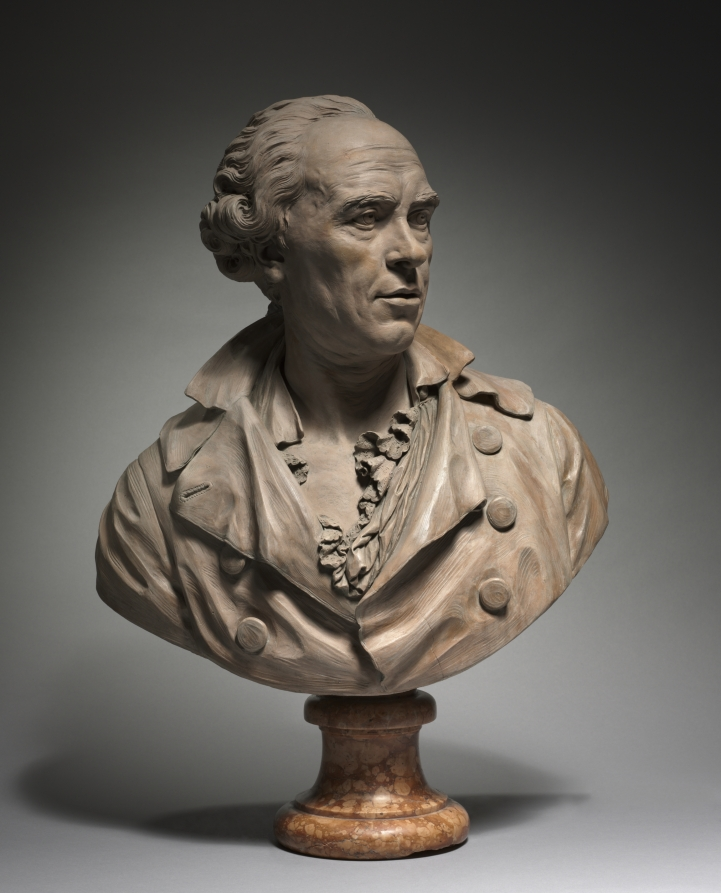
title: Portrait of Hubert Robert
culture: France, early 20th century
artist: copy after Augustin Pajou (French, 1730–1809)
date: early 1900s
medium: terracotta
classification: Sculpture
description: James David Draper published this work in 1997 as a 19th-century copy after Pajou, one of a number of copies after the primary version in Valence, partly owing to the slightly stiffer carving of the Cleveland bust and the lack of psychological depth compared to the autograph version. A thermoluminescence test, which determines the age of fired ceramics through small samples of the clay, proved that the work could not be dated before the late 19th century, and could easily date to the 20th century. Many of the copies after Pajou may well postdate Henri Stein's 1912 monograph, when the originals became available in photographic form, and the Cleveland bust is one of the stronger and most convincing examples.